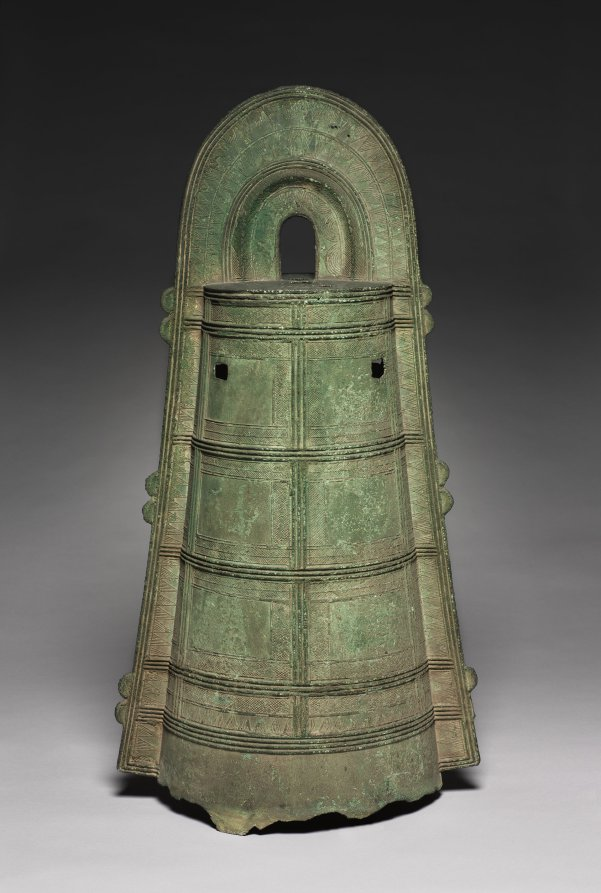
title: Dōtaku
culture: Japan, Yayoi period (c. 300 BCE–300 CE)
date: 100–200 CE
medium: cast bronze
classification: Metalwork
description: The flow of new peoples from Korea to Japan during the Yayoi period brought new technologies of bronze and iron casting. Similarly, the form of the dōtaku, or bronze bell, is thought to have originated in Korea. The original Korean prototypes—stout, thickly cast bells—were transformed in Japan into sculptural forms with sophisticated surface decoration. These dōtaku are often uncovered near burial sites paired with a metal spear or sword nearby, suggesting ceremonial importance.